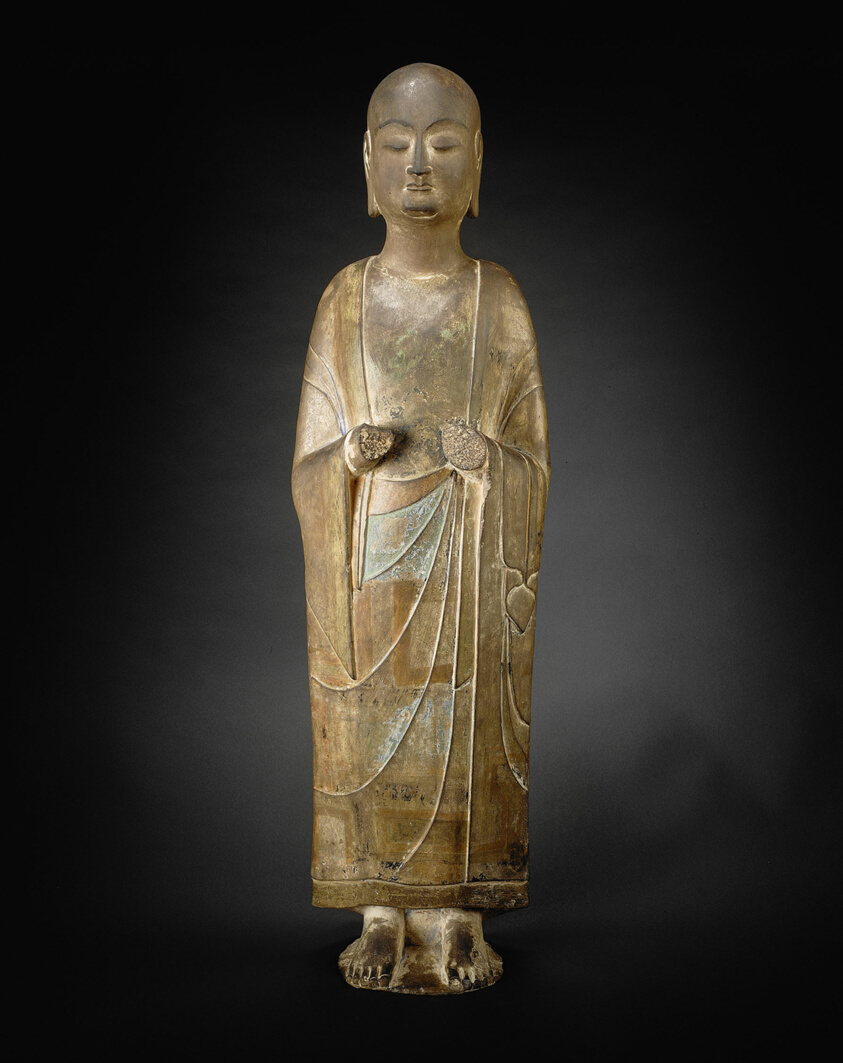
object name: Sculpture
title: Monk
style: Chinese (culture or style)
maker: China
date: Sui Dynasty (589–618 A.D.)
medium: Limestone with traces of polychromy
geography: China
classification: stone (unidentified); stone; sculpture; asian art